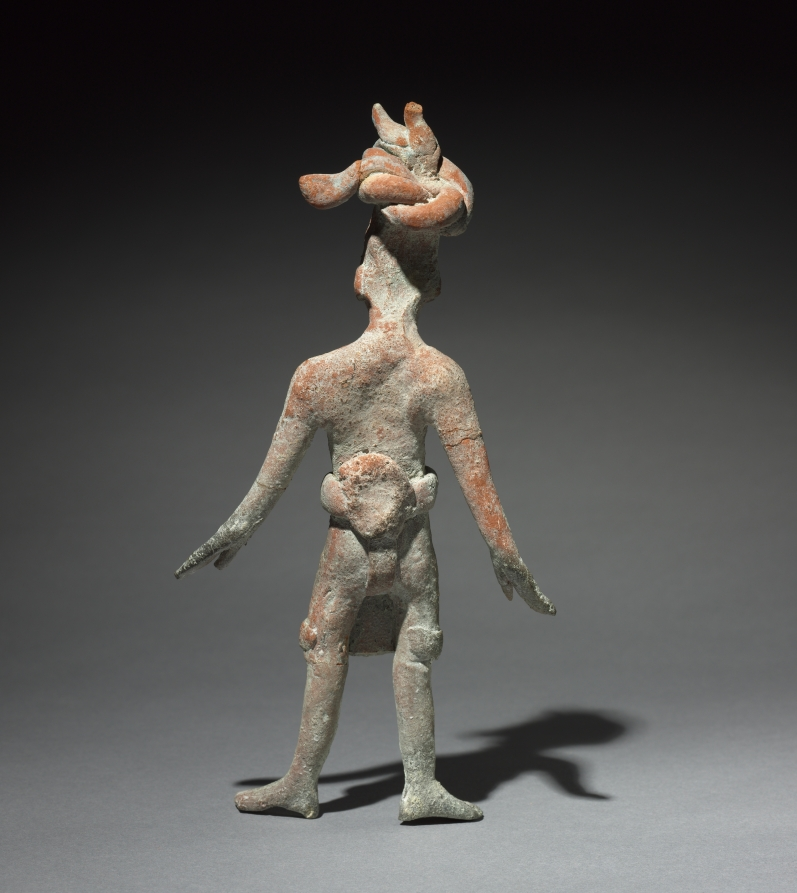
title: Jaina Figure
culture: Maya, Late Classic, 7th-8th Century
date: 600s-700s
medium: terracotta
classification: Sculpture